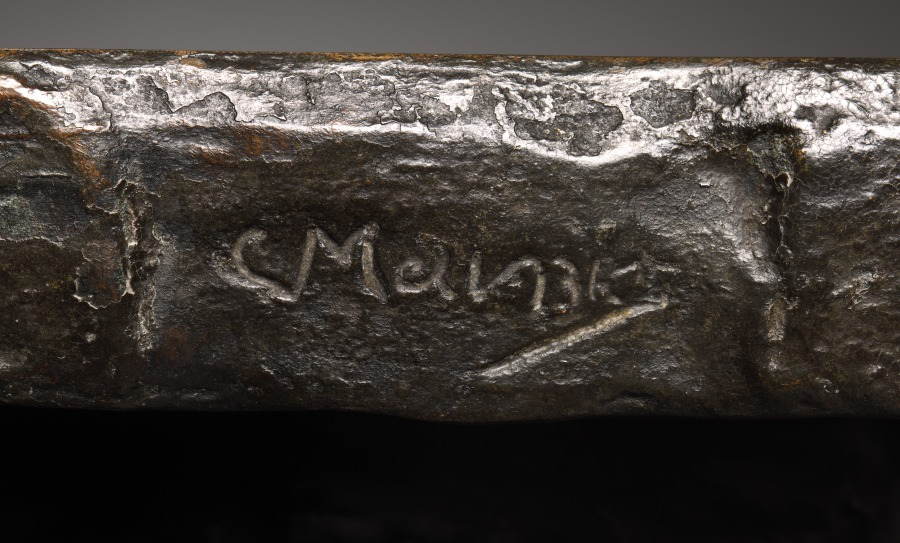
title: The Miners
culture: Belgium, 19th century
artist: Constantin Meunier (Belgian, 1831–1905)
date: c. 1890 – 1900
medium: bronze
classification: Sculpture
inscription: Signed on top: "C. Meunier"; inscribed on right side: "Atelier C. Meunier, 50 Rue (?)"